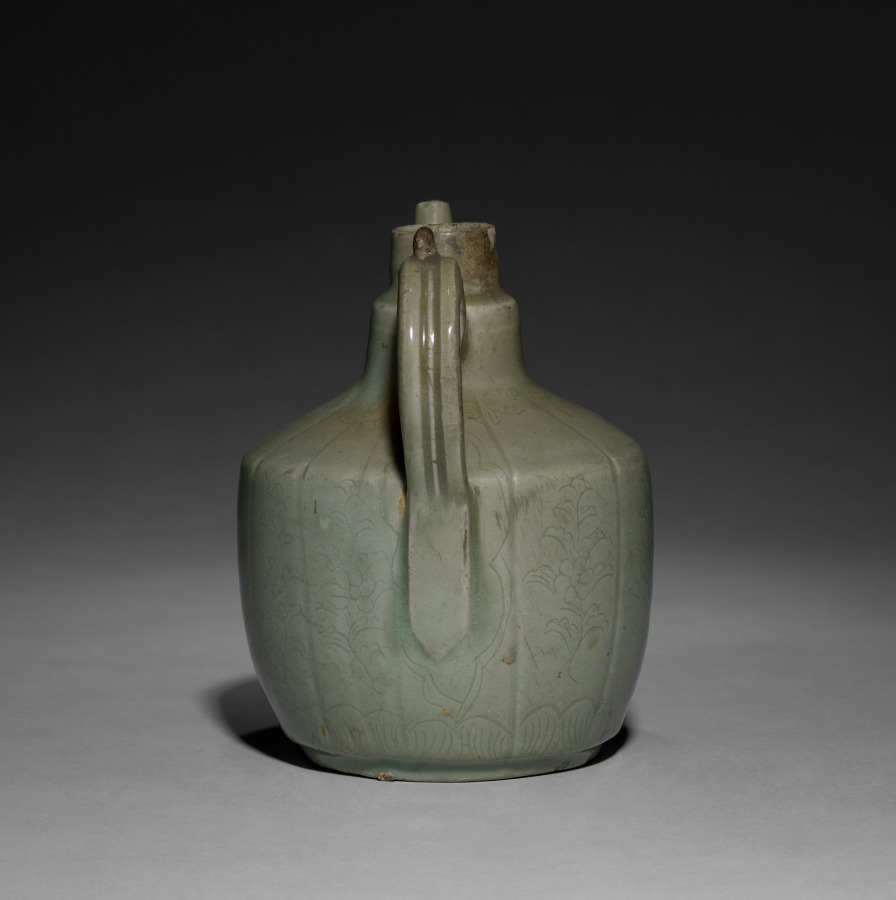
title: Wine Pot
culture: Korea, Goryeo dynasty (918–1392)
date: 918–1392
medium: pottery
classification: Ceramic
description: As early as the seventh century, the practice of drinking tea and wine became an important part of elite culture in Korea. Elites of the Goryeo period commissioned a variety of types of utensils and vessels including this elegant wine pot, not only to make their drinking experience more exciting, but also to show their appreciation of nature.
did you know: A chain or cord once connected a small loop on the handle and the lid to serve beverages without spilling.